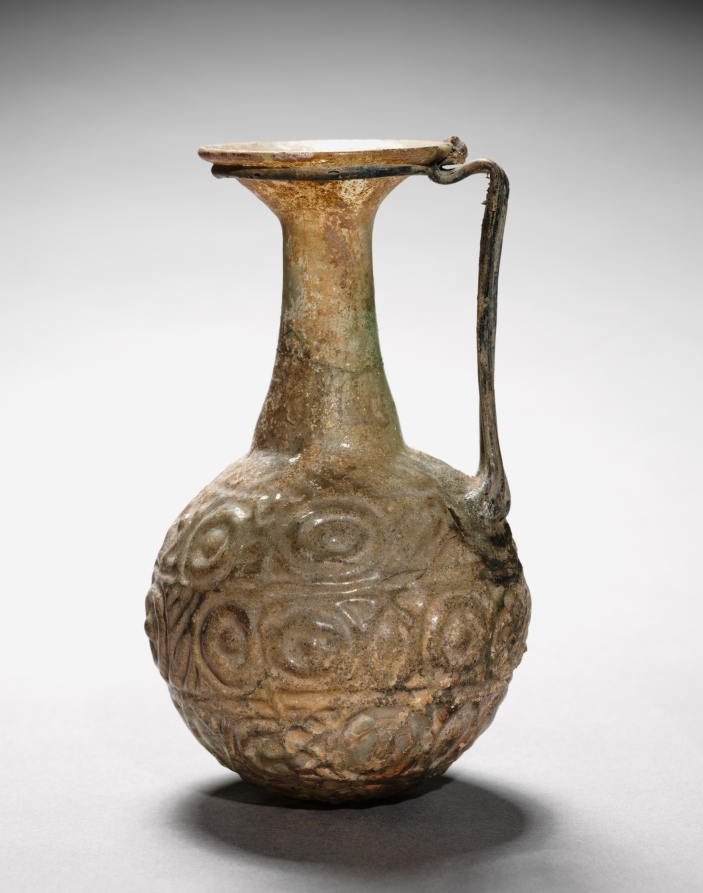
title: Pitcher with Handle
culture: Roman, Syro-Palestinian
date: 300s CE or later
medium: glass, mold-blown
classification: Glass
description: Featuring a globular mold-made body with three bands of geometric ornament (mostly concentric circles) in low relief, this pitcher could have been used for pouring water, wine, or other liquids. The separately made handle, decorated with four vertical ribs, is attached below the wide mouth by means of a coil.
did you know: Even the underside of this pitcher’s base is decorated, with a mold-made sunburst pattern.